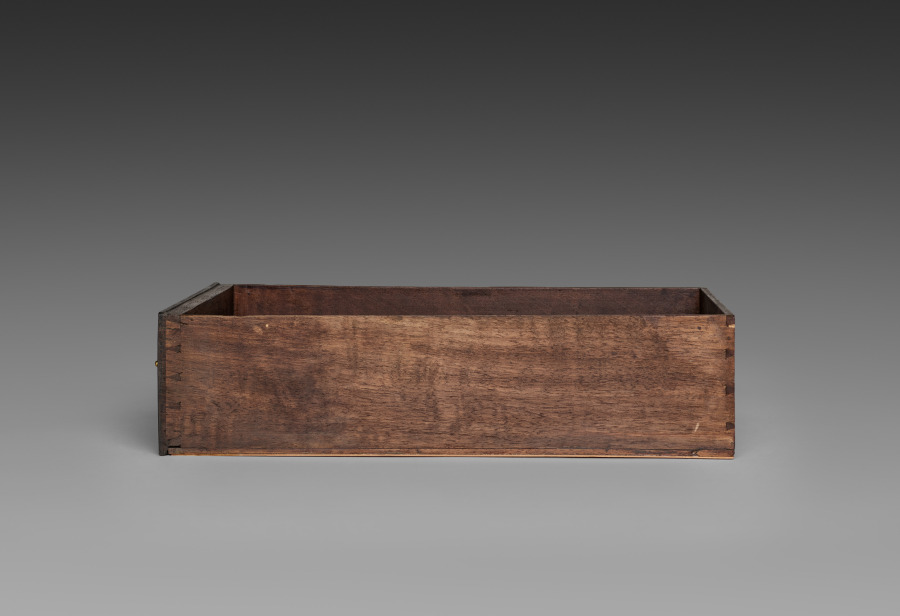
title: Interior Drawer for Cabinet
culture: France, late 17th Century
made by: André-Charles Boulle (French, 1642–1732)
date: c. 1690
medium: ebony, marquetry in metal and tortoiseshell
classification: Furniture and woodwork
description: Appointed cabinetmaker to King Louis XIV in 1672, André-Charles Boulle became a master of furniture making in France during the late 1600s until his death in 1732. Known primarily for his use of marquetry, in which metal patterns are inlaid into tortoiseshell then applied within the veneered surface of the furniture, Boulle established a level of quality and craftsmanship few others could achieve. As a result, his work found favor at the royal court and among other aristocrats and diplomats eager to impress the king. The inclusion of a medallion depicting Louis XIV within the bronze decoration of this chest would have identified the owner with the royal court. Often exhibiting stout architectural proportions with elegant groups of inlaid motifs such as the parrot on the central panel of this chest, Boulle’s designs are an example of the intellectual fashion for contrasting ideas, materials, and motifs.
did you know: Originally designed to sit atop an elaborate tall stand, this chest was likely altered in the late 1700s to reduce its scale and height.